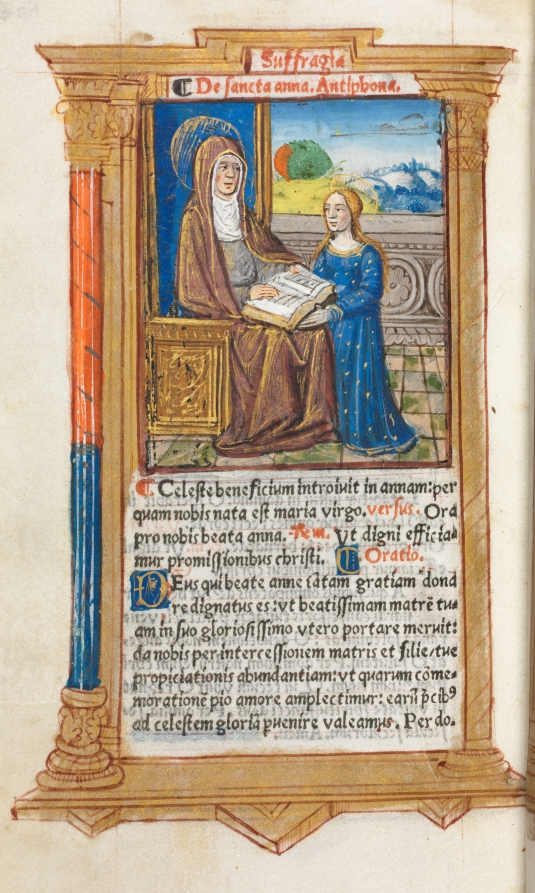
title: Printed Book of Hours (Use of Rome): fol. 108v, Saint Anne and the Virgin Mary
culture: France, Paris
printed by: Guillaume Le Rouge (French, Paris, active 1493–1517)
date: 1510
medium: 112 Printed folios on parchment, bound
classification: Bound Volume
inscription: Caeleste beneficium introivit in Annam per quam nobis nata est Maria virgo. V: Ora pro nobis beata Anna. R: Ut digni efficiamur promissionibus Christi. (Ant: A heavenly blessing entered into Anne, through whom the Virgin Mary was born for us. V: Pray for us, blessed Anne. R: That we be made worthy of the promises of Christ.) Oratio: Deus qui beatae Annae tantam gratiam donare dignatus es: ut beatissimam matrem tuam in suo gloriosissimo utero portare meruit: Da nobis per intercessionem matris et filiae tuae propitiationis abundantiam: ut quarum commemorationem pio amore amplectimur: earum precibus ad caelestem patriam pervenire valeamus. Per eundem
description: Printed books of hours were produced between 1485 and 1520. Significantly less expensive than handwritten production, printing made books of hours’ popularity soar. More than 1,775 different versions were printed during this time, allowing much customization. This hybrid version has printed text but hand-colored images and comes from Paris, a major center of book production. Open to the suffrages, indicated in red at the top, one page is devoted to Saint Anne and one to Mary Magdalene. Other versions of this book of hours have less color and attention to detail, indicating a higher price paid for this edition.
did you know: A typical book of hours contains around a dozen suffrages, also known as memorials, from the Latin memoriae.